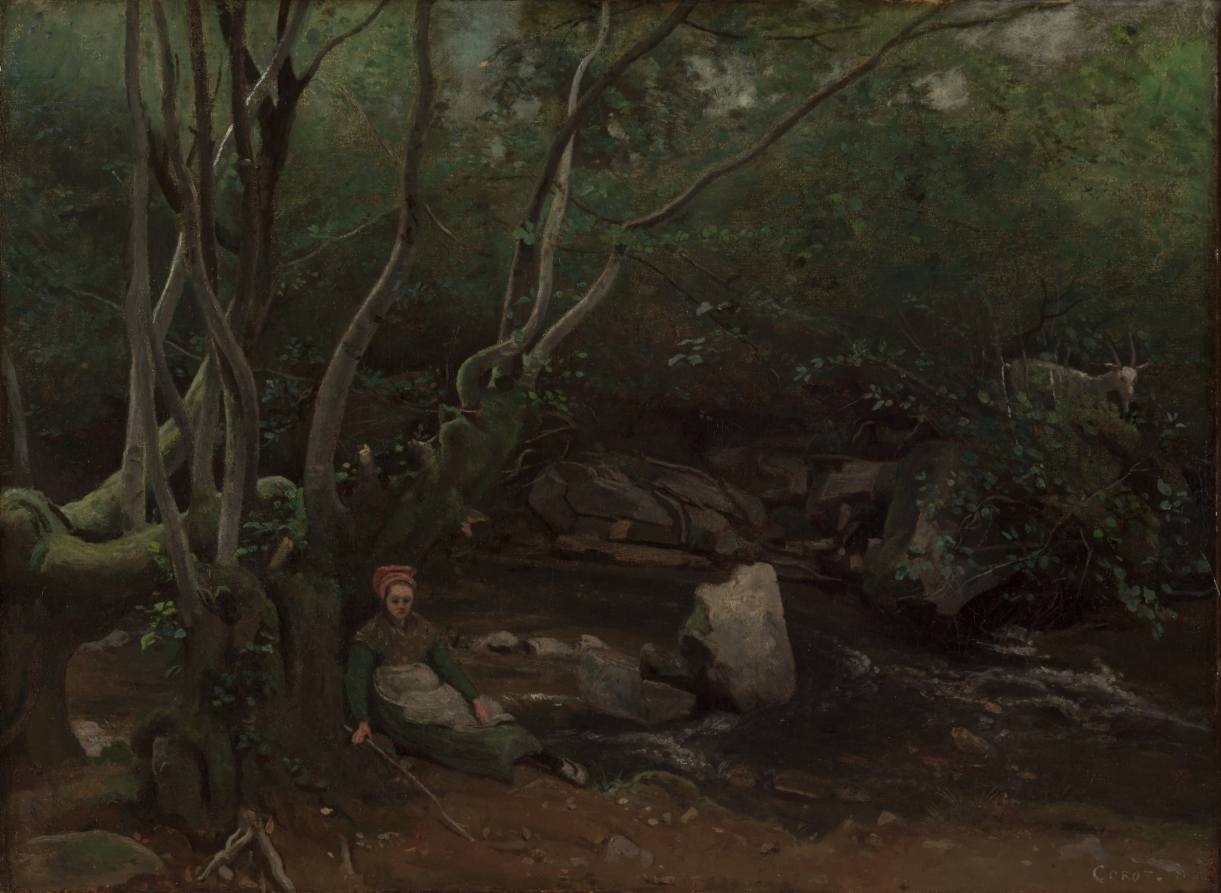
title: Lormes: Goat-Girl Sitting Beside a Stream in a Forest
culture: France, 19th century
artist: Jean Baptiste Camille Corot (French, 1796–1875)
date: 1842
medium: oil on fabric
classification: Painting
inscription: Signed lower right: Corot 1842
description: Camille Corot painted this charming woodland scene during the summer of 1842 while visiting Lormes, a small village in the Morvan region of Burgundy. The area was known for its dense woodlands and picturesque falls. Corot included a seated goat shepherd leaning against a curving tree trunk, but instead of commanding the viewers attention, the human presence is overshadowed by the dynamic interlacing forms of the tree trunks and branches that stretch up and across the canvas.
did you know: Claude Monet once said: "There is only one master here—Corot. We are nothing compared to him, nothing."